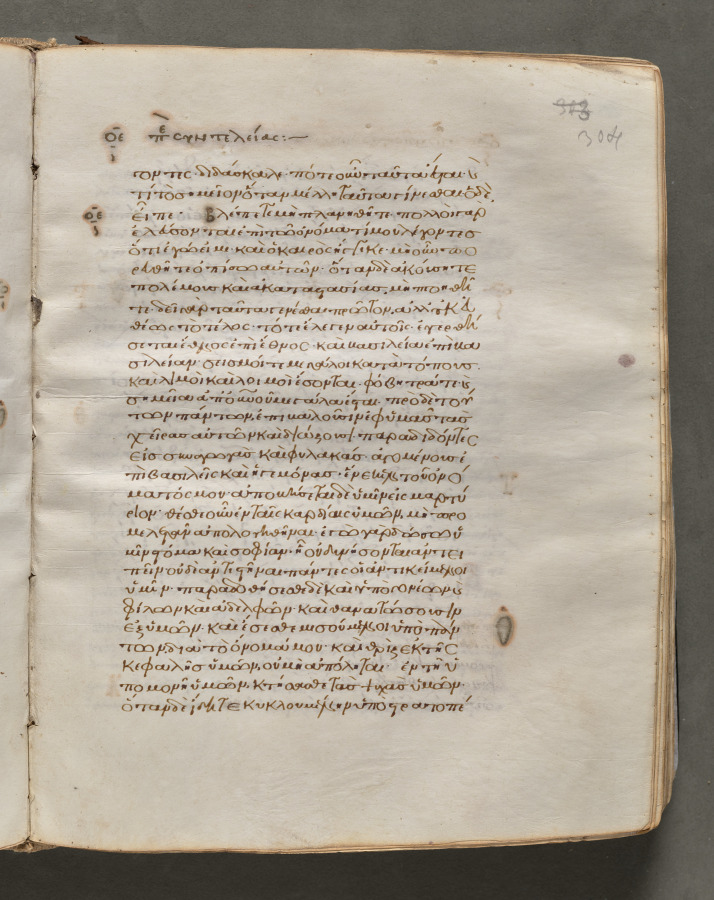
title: Text, folio 304 (recto), from a Gospel Book with Commentaries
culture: Byzantium, Constantinople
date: c. 1000–1100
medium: ink, tempera, and gold on vellum; leather binding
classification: Bound Volume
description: Each of the four gospels in this book opens on a page with brilliantly illuminated borders depicting the author of the text as well as birds—principally peacocks, symbols of the immortality of the soul—and fountains, representing the fountain of life and the salvation of the soul. This volume consists of 428 leaves with texts in Greek. Its level of sophistication suggests that it was probably written and decorated in a monastery in Constantinople.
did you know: Gospel books were carried in procession through Byzantine churches.